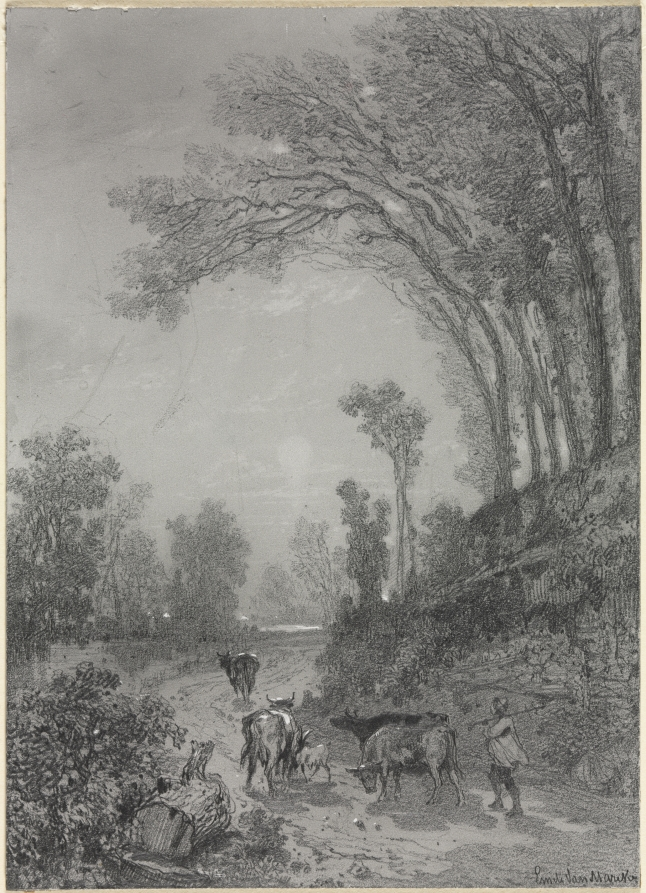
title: Landscape with Cows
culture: France, 19th century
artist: Émile van Marcke (French, 1827–1890)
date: second half 19th century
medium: graphite, with gray ground scratched away for heightening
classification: Drawing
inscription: signed, lower right, in graphite: Emile Van Marcke ; VERSO, upper left, in graphite: [illegible, partially masked] 1 ; upper right, in graphite: A #2 25- ; upper center, in graphite: Felix Braud / 33, Rue Nue [ue superscript] de Petit-Champs / -Paris ; lower right, in graphite: 228